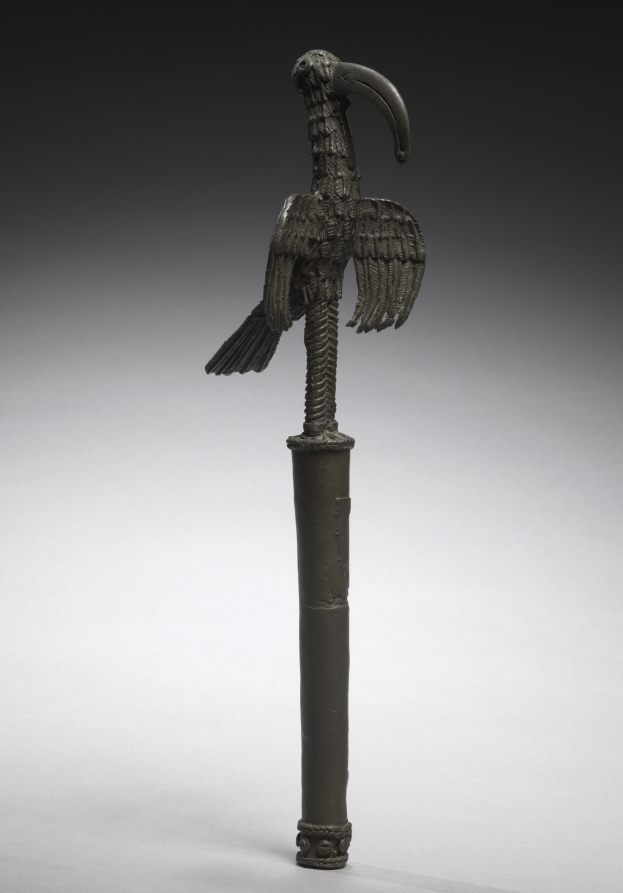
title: Idiophone/Staff (ahianmwẹn-ọrọ)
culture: Nigeria, Benin Kingdom, Ẹdo peoples, members of the Igun Eronmwon (royal brasscasters) guild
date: possibly 1800s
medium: Copper alloy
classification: Sculpture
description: Courtiers, priests, and senior chiefs strike instruments like this during the Ugie Ọrọ festival. The long-legged metal bird refers to the 16th-century ruler Ọba Ẹsigie. Wings outstretched with long, textured feathers, it is the ahianmwẹn-ọrọ (bird of prophecy). It stares outward, a likely magical substance clenched in its beak. Such a bird prophesied Ẹsigie’s defeat and death during the Idah War (about 1515–17), leading his people to resist fighting for him. When Ẹsigie triumphed, bronze bird effigies were beaten for days on end throughout the year. This punished the false avian prophet and shamed the cowardly men.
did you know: An image of the ahianmwẹn-ọrọ (bird of prophecy) once sat atop the roof of the palace in the Benin Kingdom.